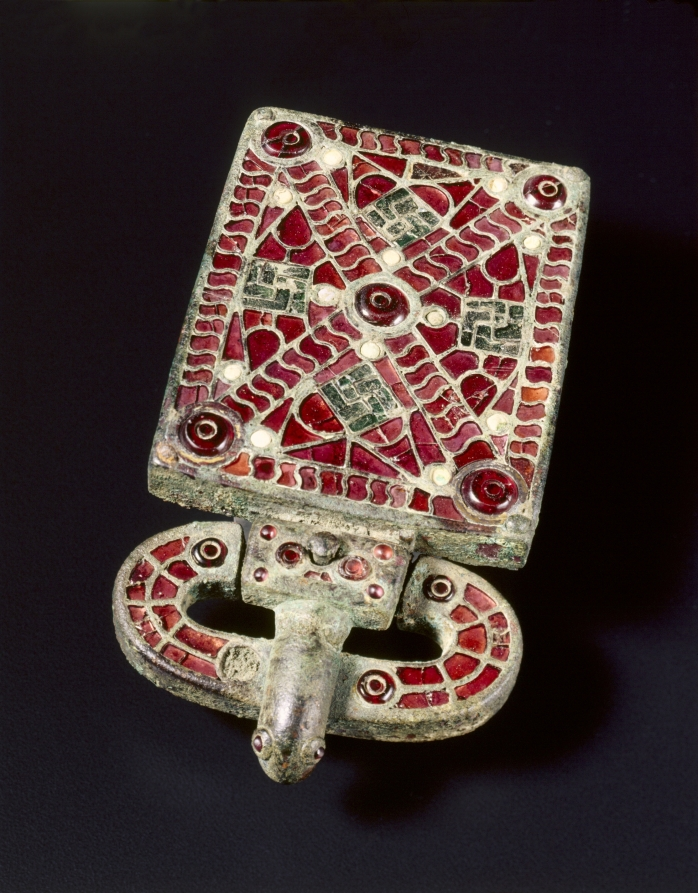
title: Belt Buckle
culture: Visigothic, Spain, Migration Period, 6th century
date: c. 525–560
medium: bronze with garnets, glass, mother of pearl, gold foil, traces of gilding; bronze and glass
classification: Jewelry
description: The art of the European Migration Period (3rd-7th centuries AD) is almost exclusively one of personal adornment-a portable art that followed men and women to their graves. Belt buckles with large rectangular attachment plates have been discovered in cemeteries across the Iberian Peninsula-now occupied by Spain and Portugal-from the period of Visigothic occupation (about AD 412-711). Their decoration varies. Finer examples, like this one, are distinguished by brilliantly inlaid semi-precious stones and colored glass. Garnets were especially prized in Visigothic society for use in cloisonné jewelry. The technique involved the fitting of carefully cut pieces of polished garnet into an intricate grid of compartments, or cloisons. This buckle is so densely inlaid with garnets that it presents a virtual "carpet" of red to the eye. These large Visigothic buckles are strikingly uniform in shape yet endlessly varied in surface design, perhaps a sign that they expressed the personal identities of their original owners. Grave excavations have shown that belt buckles of this type were made for women.